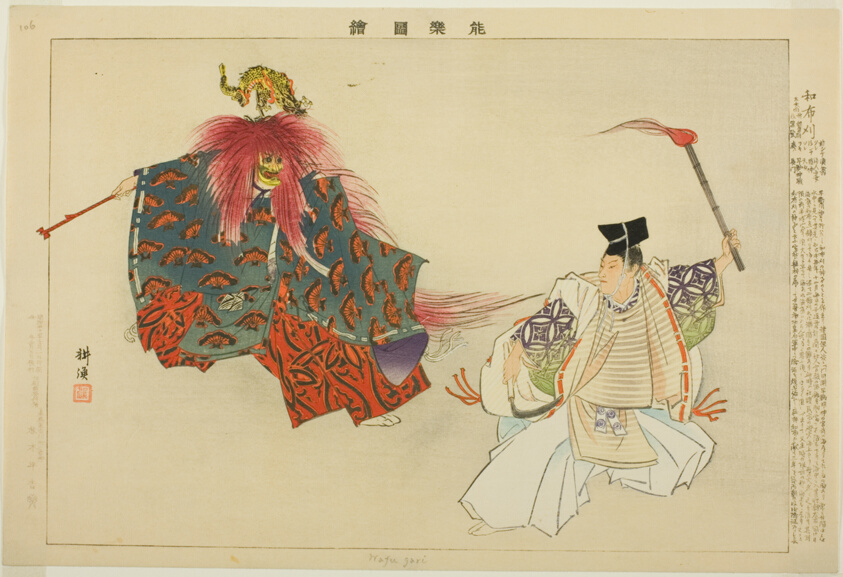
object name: Print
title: Mekari, from the series "Pictures of No Performances (Nogaku Zue)"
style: Japanese (culture or style)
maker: Tsukioka Kogyo; Japanese, 1869-1927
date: 1898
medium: Color woodblock print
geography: Japan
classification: woodblock print; print; asian art